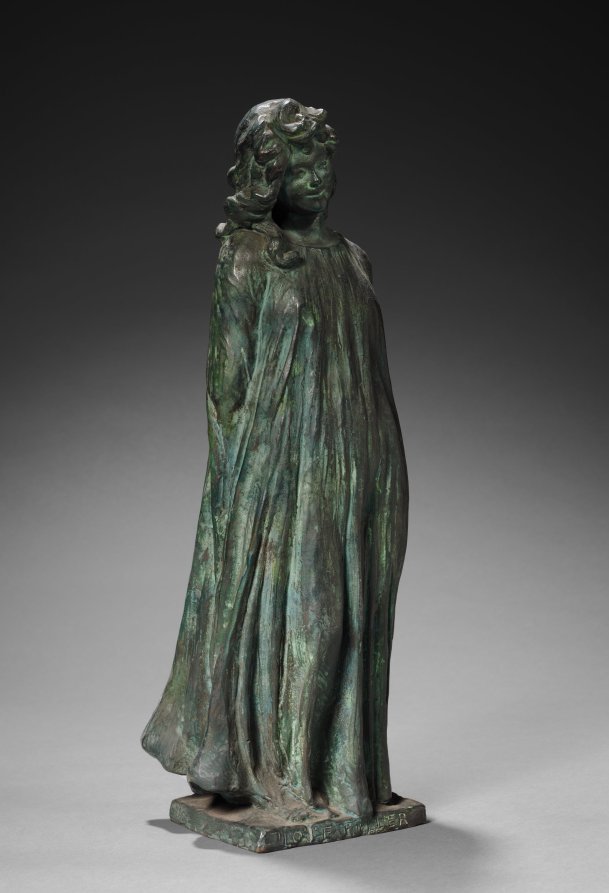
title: Loïe Fuller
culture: France, 19th-20th century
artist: Pierre Roche (French, 1855–1922)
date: c. 1900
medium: bronze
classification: Sculpture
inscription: Inscribed on the face of the base: "Loïe Fuller" and at the right, signature of the artist